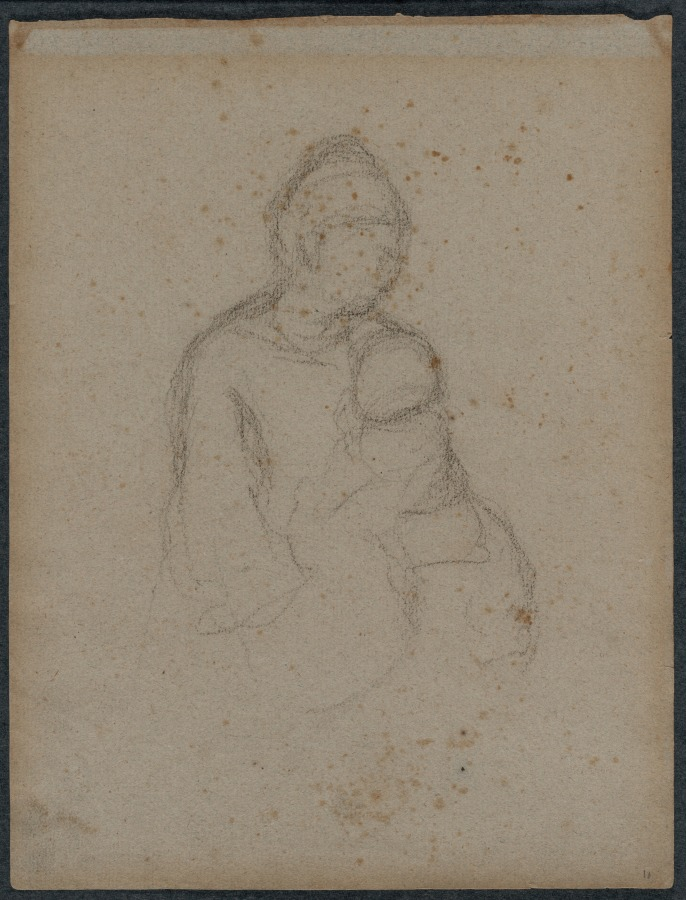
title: Mother and Child (recto)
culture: France, 19th century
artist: Paul Gauguin (French, 1848–1903)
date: 1870s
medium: black chalk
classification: Drawing